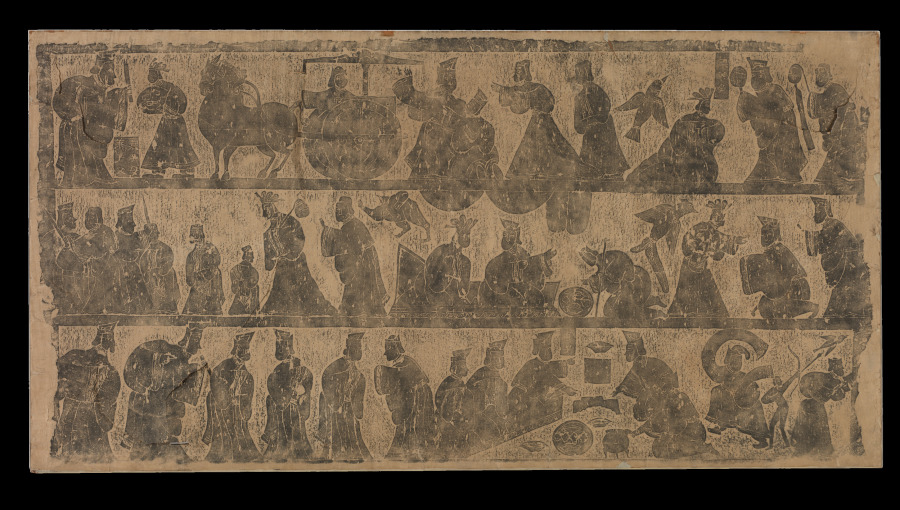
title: Rubbing of a Stone from the Tang-Fang Collection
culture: China, Qing dynasty (1644-1911) or Republican period (1912-49)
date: 1900–1916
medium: Rubbing, ink on paper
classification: Miscellaneous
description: Figures, birds, and a chariot depicted in three registers correspond to a stone relief from the east wall of the front stone chamber in the Wu Liang shrine: the top register shows a procession with a horse carriage; the second has scenes of filial piety; the third presents a banquet scene. However, missing inscribed labels to identify the scenes and a carriage replaced by two figures in the lower left corner reveal that this rubbing differs from the Wu Liang shrine version. The museum’s rubbing was either altered, taken from a different local Han dynasty shrine, or from a later stone slab that was recarved to produce rubbings for the market.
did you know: The process of making rubbings has been done in China since at least the 6th century.